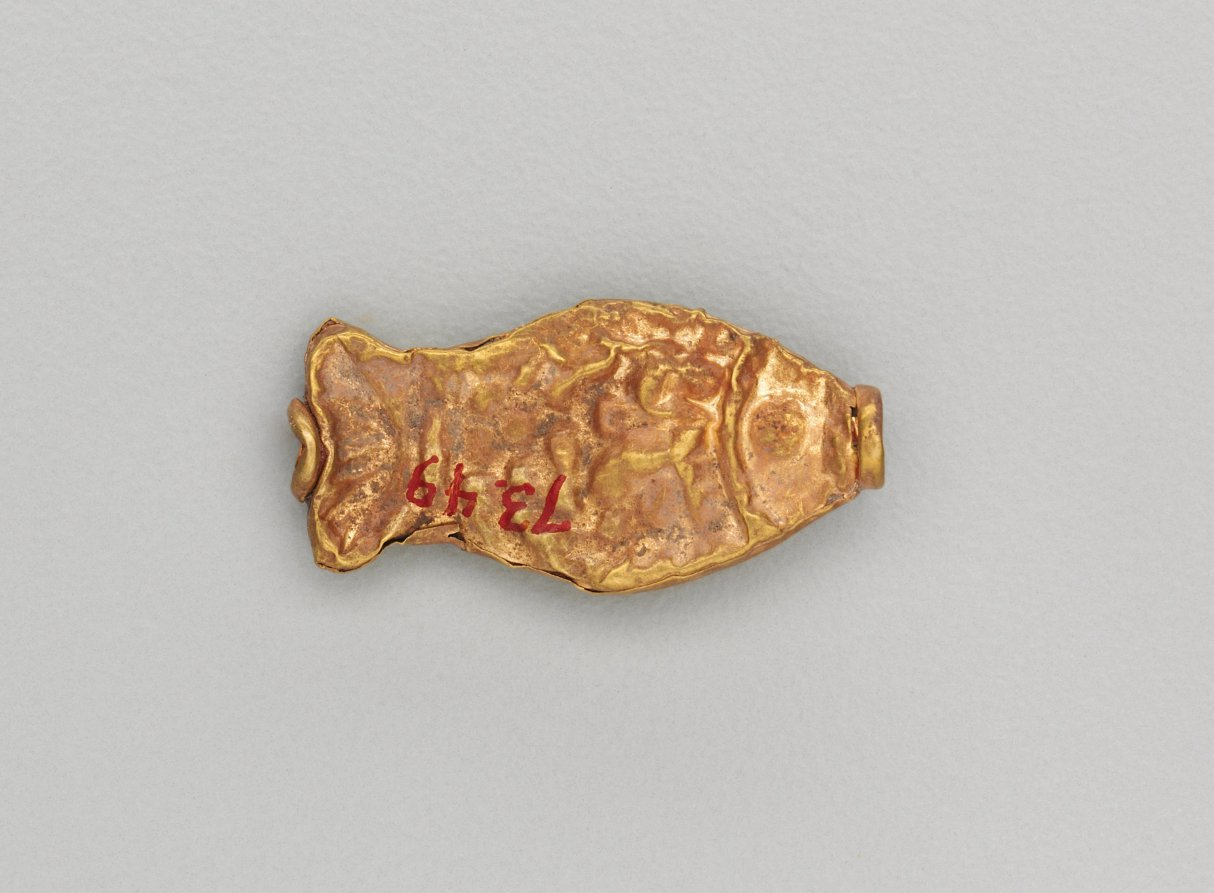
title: Necklace Bead in the Form of a Fish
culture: India, Shunga period (185–78 BCE)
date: 185–72 BCE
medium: gold repoussé with granulation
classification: Jewelry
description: Jewelry in ancient India often consisted of elements associated with water, such as fish and other aquatic plants and animals. Since water is essential for life, imagery that connotes water is life-affirming, or auspicious, and therefore appropriate adornment.